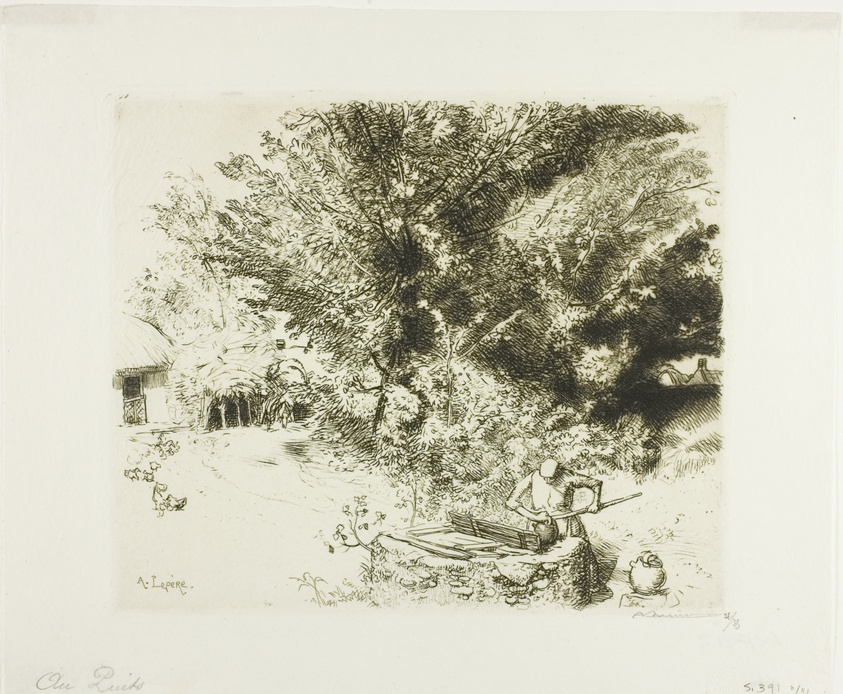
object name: Print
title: At the Well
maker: Louis Auguste Lepère (French, 1849-1918)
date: 1911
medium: Etching on cream wove paper with pronounced mesh pattern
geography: France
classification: etching; print; prints and drawing